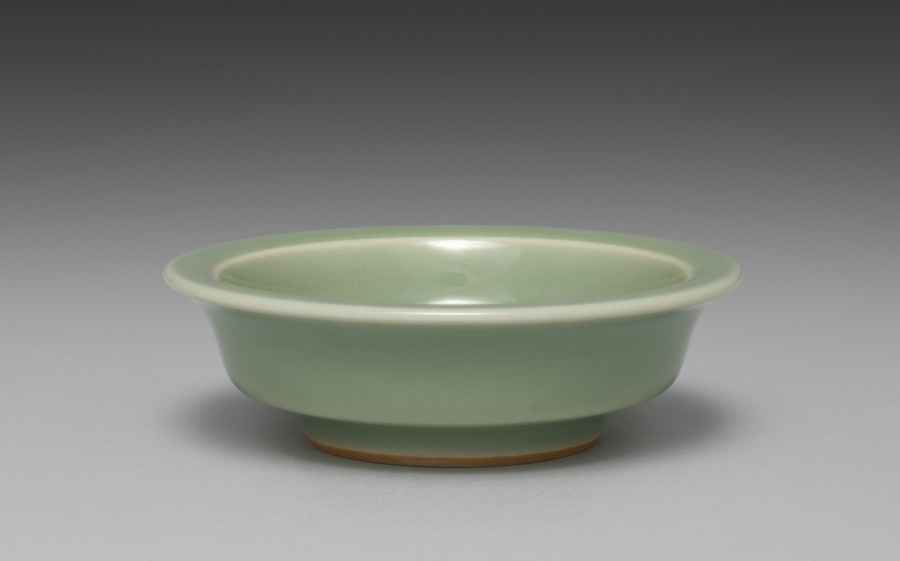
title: Saucer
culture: Japan, Meiji period (1868–1912)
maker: Seifū Yohei III (Japanese, 1851–1914)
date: 1893–1914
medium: One from a set of ten dishes; porcelain with green glaze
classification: Ceramic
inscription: 清風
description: Yohei III’s main output for his sophisticated clientele was in the form of tea sets and dining sets. He created a range of dishes in green glazes. He often produced in pairs, sets of five, or sets of ten. For this set of ten small dishes in a simple, round form that emphasizes the glaze above all, the box lid designates the piece as seiji, or green-glazed porcelain, using a general term for the extensive palette of green glazes often called celadon in English. The box lid further identifies the dishes themselves as tōchō, literally “bean-sized saucers,” a size that makes them suitable for dipping sauces.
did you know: The ten dishes in this set are stored in stacks of five in a two-compartment box.